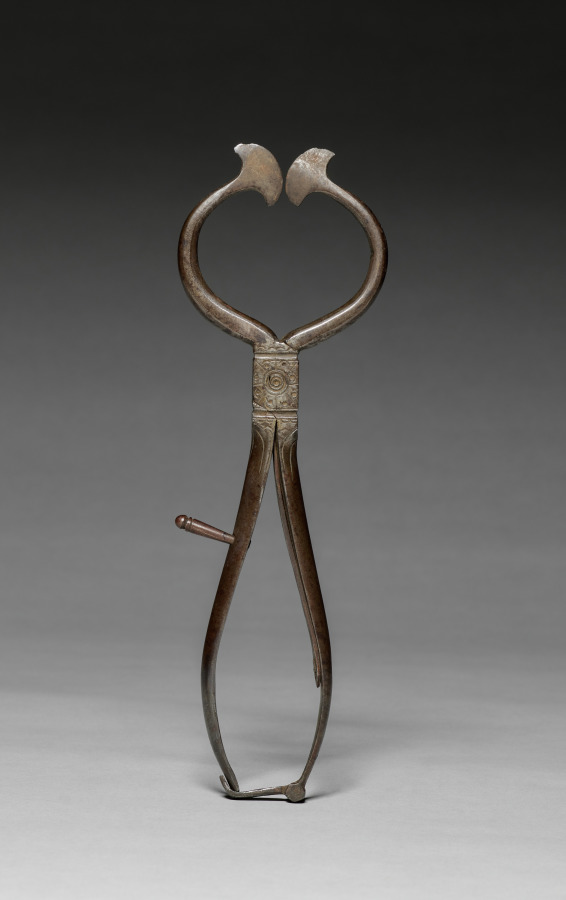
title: Cutting Pliers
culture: Germany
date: 1600s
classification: Tool